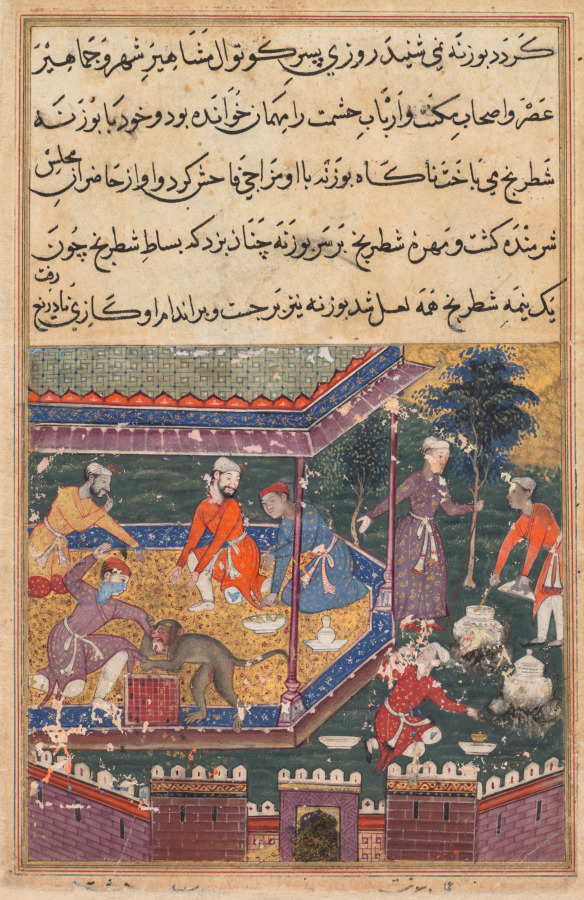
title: The wounded monkey bites the hand of the prince, his chessmate, in the presence of guests, from a Tuti-nama (Tales of a Parrot): Fifth Night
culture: Mughal India, court of Akbar (reigned 1556–1605)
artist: Dasavanta (Indian, d. 1584)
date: c. 1560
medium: gum tempera, ink, and gold on paper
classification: Painting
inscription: 'amal daswant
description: This painting depicts a scene from the cautionary tale the mother parrot tells her young to warn them that interspecies friendships, like theirs with the fox cubs, are a bad idea. She tells them that there once was a monkey who could play chess, and he enjoyed many games with a prince. When the prince invited dignitaries for a party, the monkey made a bad joke, the prince slapped him, and the monkey bit him in return. At the left, food is prepared as the guests look on in astonishment. An inscription at the bottom of the page names the artist, who went on to become one of the most celebrated Indian masters at the Mughal court.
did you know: Young master artist Dasavanta put a layer of cool blue color under his painting.